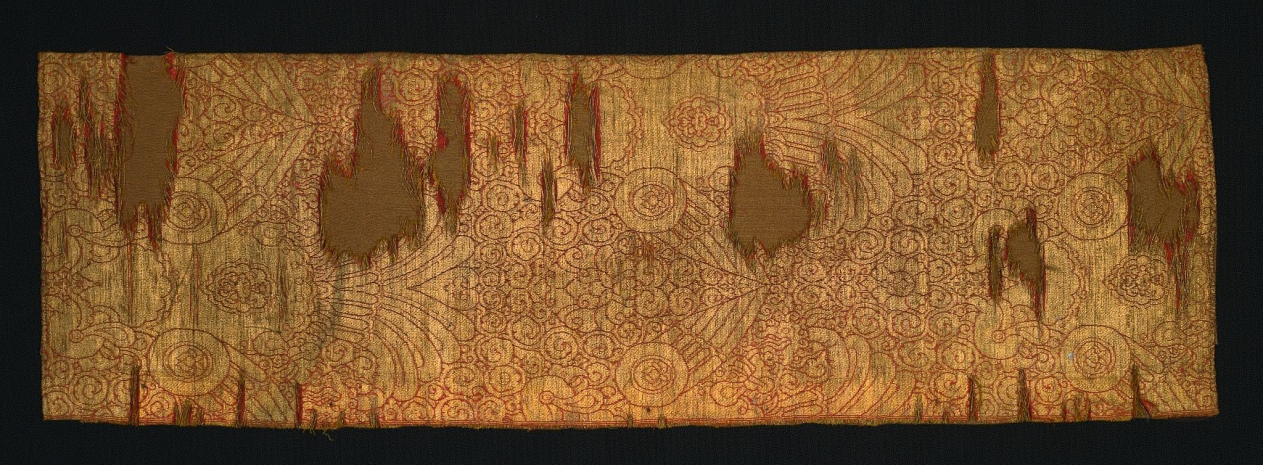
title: Cloth of Gold: Displayed Falcons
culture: Central Asia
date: mid-1200s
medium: Silk and gold thread, lampas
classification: Textile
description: Mongol ceremonial robes, known as zhisun, were made from textiles woven with gold and silk of one color. These were given by Mongol emperors to members of the court to be worn during festivals and on important occasions that usually included lavish banquets. Like the Winged Lions and Griffins (CMA 1989.50), the design of this silk is a uniquely Central Asian synthesis of eastern Iranian and Chinese elements. Motifs and technical details shared by the two silks, moreover, leave no doubt that they were produced in the same city.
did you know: This silk lampas weave textile with gold thread features double-headed falcons against a background of vine scrolls.